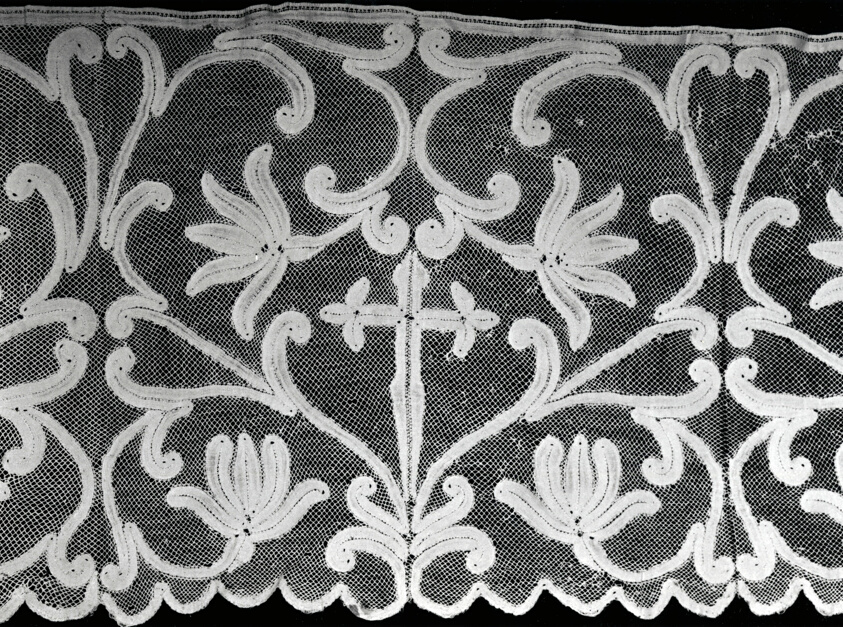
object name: Textile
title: Flounce (From an Alb)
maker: Northern Italy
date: 1725/75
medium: Linen, bobbin part lace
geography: Italy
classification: textile; lace - bobbin